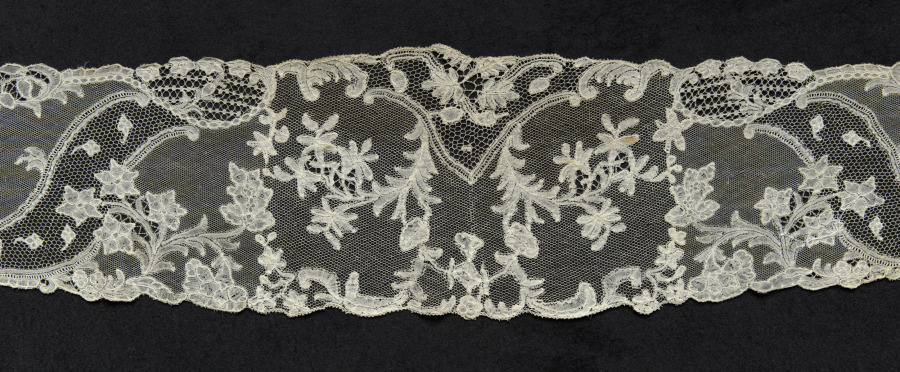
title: Lace Lappet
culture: Belgium, Brussels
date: early 1700s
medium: Bobbin lace (Point d'Angleterre)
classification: Lace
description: Based on its design, this lace lappet can be dated to early in the reign (1715–1774) of Louis XV.